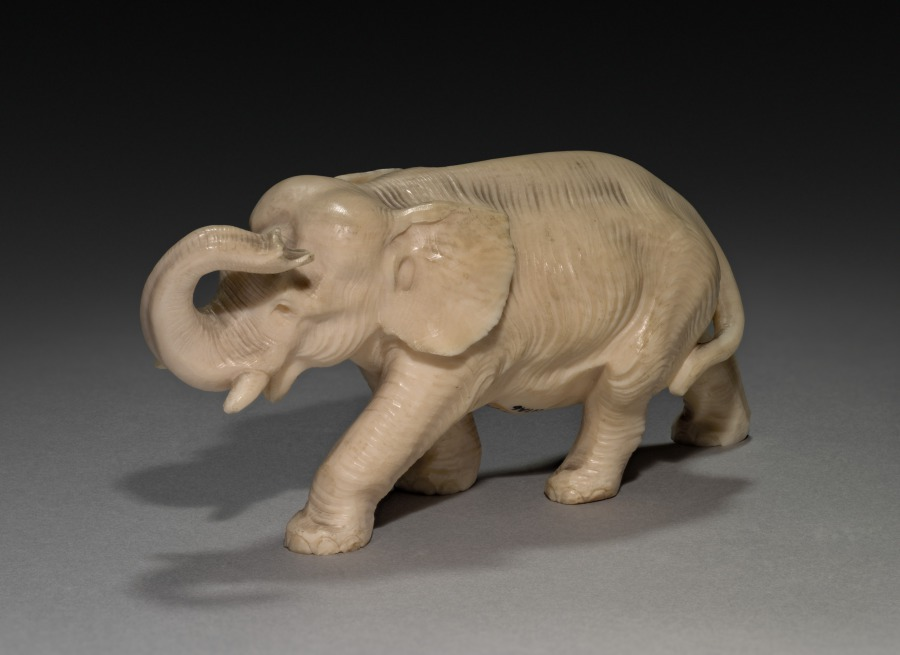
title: Elephant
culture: Japan, Meiji period (1868–1912)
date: early 1900s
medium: ivory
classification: Ivory